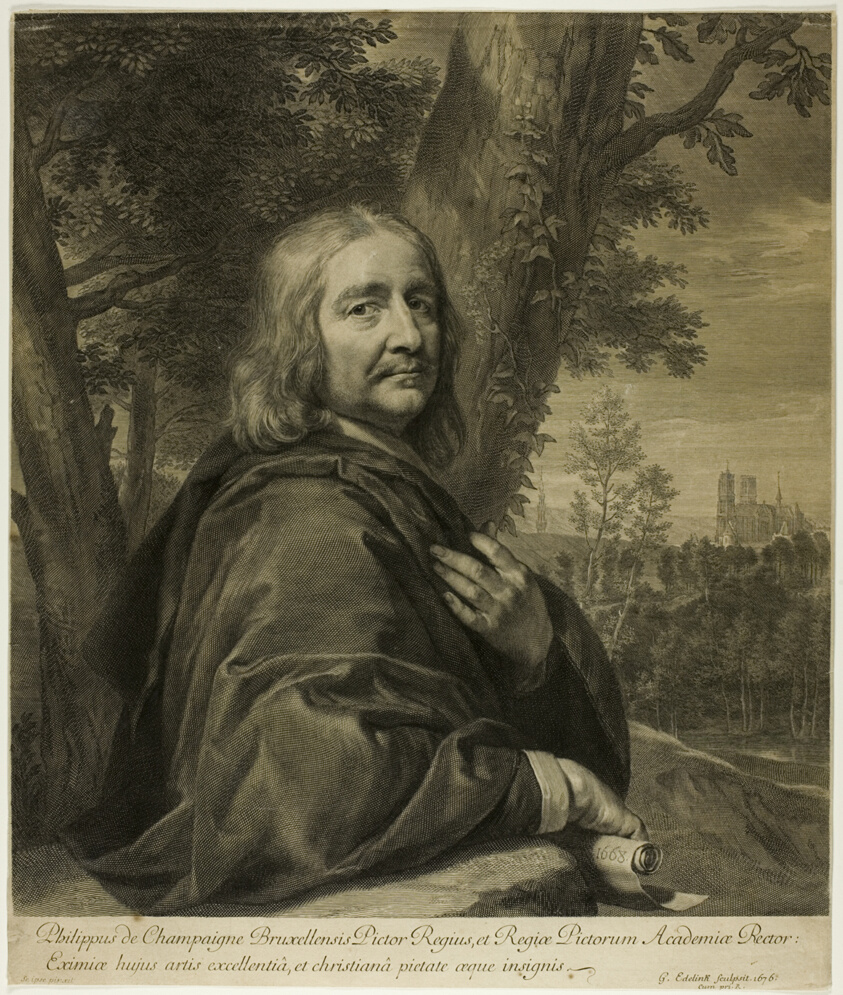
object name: Print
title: Philippe de Champaigne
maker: Gérard Edelinck (French, born Flanders, 1640-1707); after Philippe de Champaigne (French, 1602-1674)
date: 1676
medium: Engraving on paper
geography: France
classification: engraving; print; prints and drawing